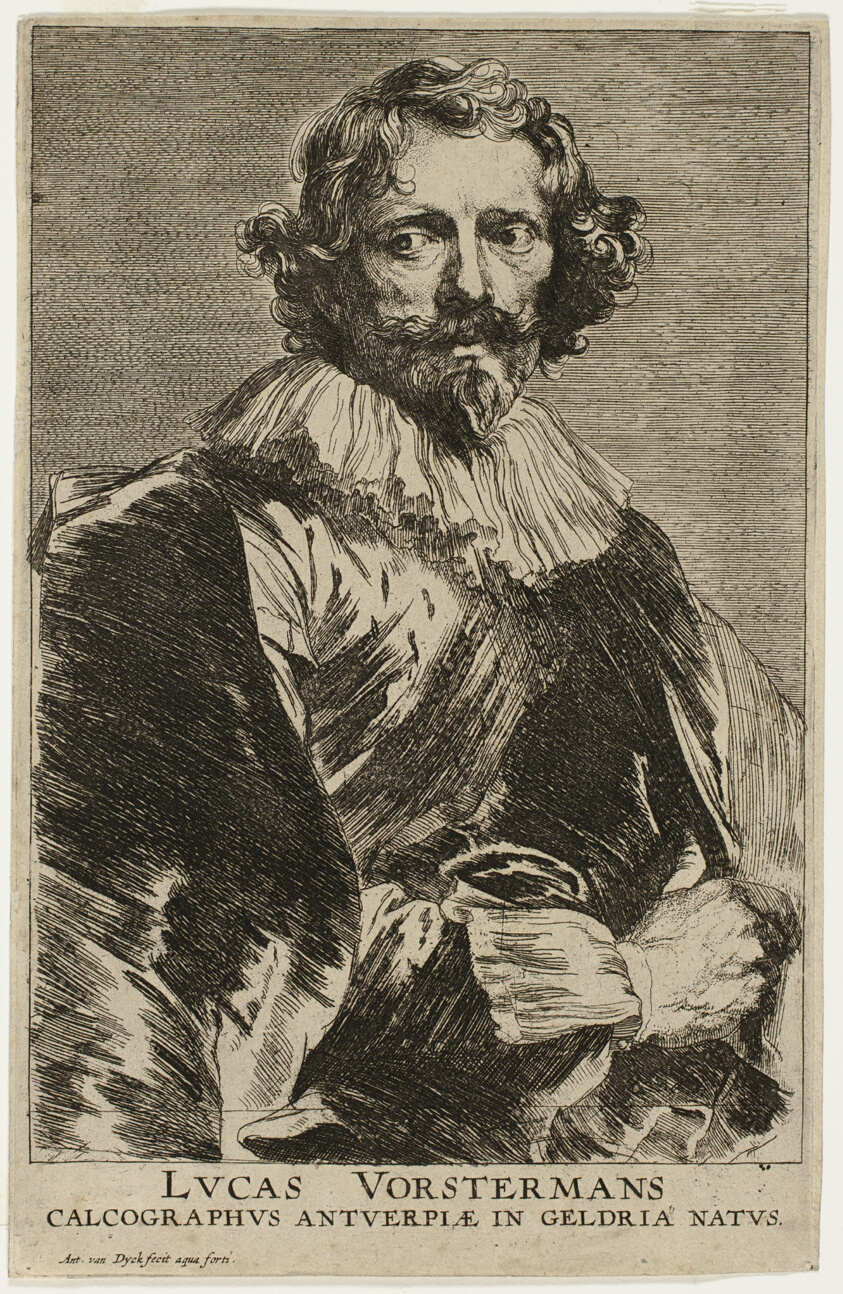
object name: Print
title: Lucas Vorsterman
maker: Anthony van Dyck (Flemish, 1599-1641)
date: 1630/45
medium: Etching in black on cream laid paper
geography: Flanders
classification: engraving; print; prints and drawing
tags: portraits, prints and drawings